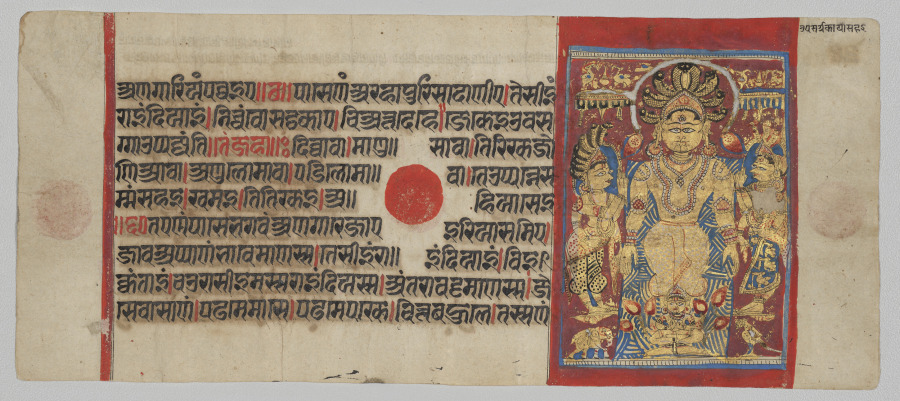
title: Parshva Undergoes Physical Trials, Folio 46 (recto), from a Kalpa-sutra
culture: Western India, Gujarat, late 15th-early 16th century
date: c. 1500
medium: Gum tempera, ink, and gold on paper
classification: Painting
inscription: [[upper right]] upasarga kāyāsahai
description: Parshva stands in a yogic posture of meditation, bearing the hardship of the elements, unmoved. When stormwaters threatened his life, serpents shielded him so that he could complete his meditations and reach liberation. One cobra stretched his seven-hooded canopy over his head like an umbrella, while a serpent king and his wife praise him. The abstract gold lines on the blue background represent the waters that rose to the level of his shoulders. In this painting, the image of Parshva wears a white lower garment, which indicates that this manuscript was made for the prominent branch of Jainism that allows monks and nuns to wear white robes.